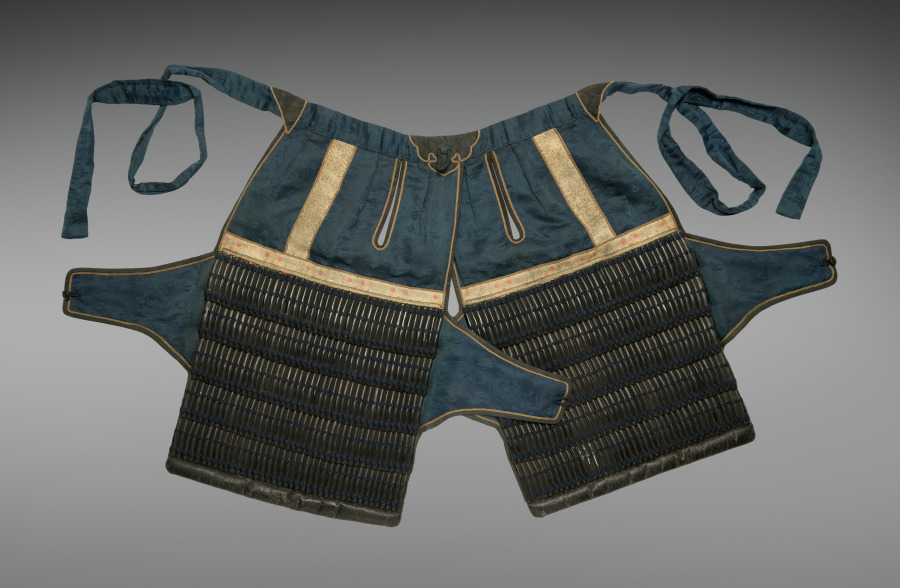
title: Armored Skirt (Haidate)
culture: Japan, Edo period (1615–1868)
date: 1600s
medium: Iron, lacquer, textile (silk)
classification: Arms and Armor